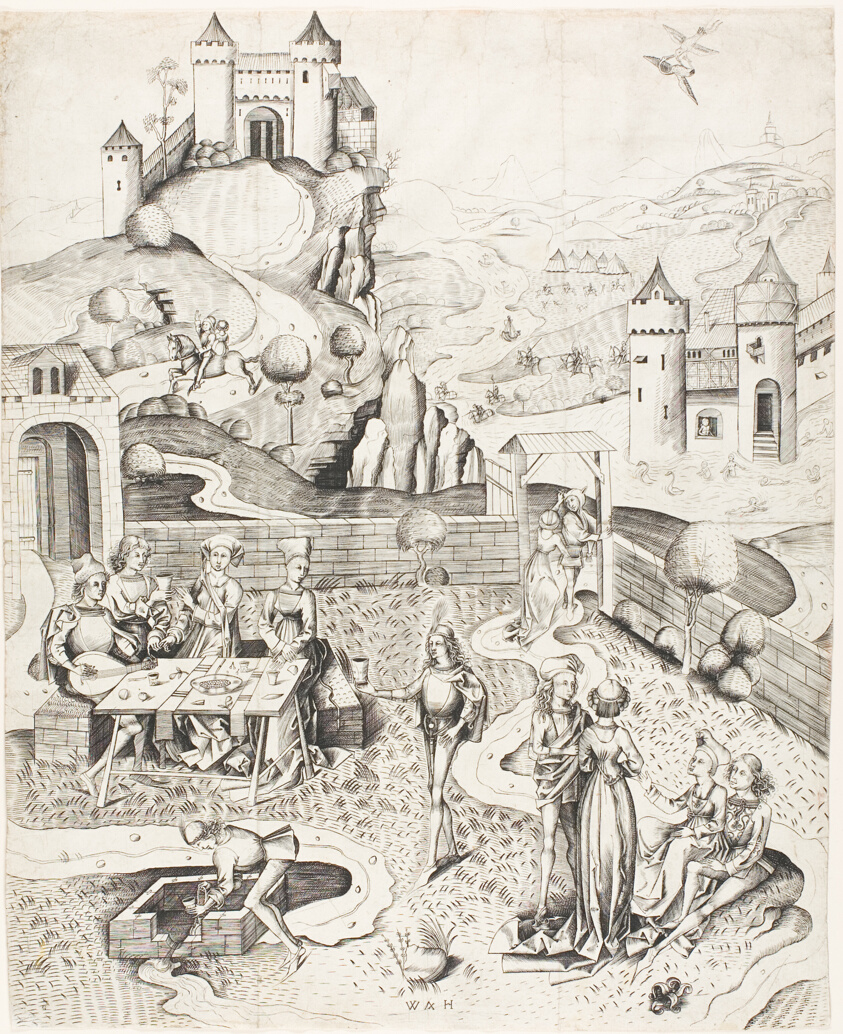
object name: Print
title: The Garden of Love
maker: Master W. A. H.; German, active c. 1480-90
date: 1480/90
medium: Engraving in black on ivory laid paper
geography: Germany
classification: engraving; print; prints and drawing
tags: gardens